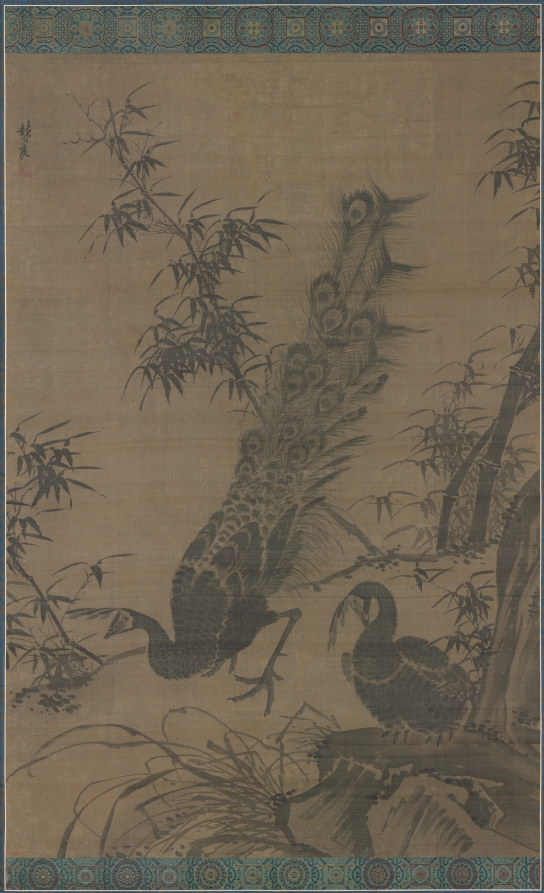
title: A Pair of Peafowl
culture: China, Ming dynasty (1368–1644)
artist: Lin Liang (Chinese, 1416–1480)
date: late 1400s-early 1500s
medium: hanging scroll, ink on silk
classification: Painting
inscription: 林良. [印] 以善圖書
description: The peacock, identified by the flamboyant tail, is paired with a female peahen to its right. In lowering her head, the hen seems to show respect to the male peacock. With his articulate brushstrokes and strong contrasting tones, Lin Liang’s representation in black ink appears as vivid as Yin Hong’s colorful peacock (1974.31). The painter skillfully uses wet and dry ink as well as broad and thin washes to represent the plumage of the bird. The surface of the rocks, depicted in powerful sweeping strokes, recalls the landscape painting style of the Zhe School, which specialized in expressive brushwork.